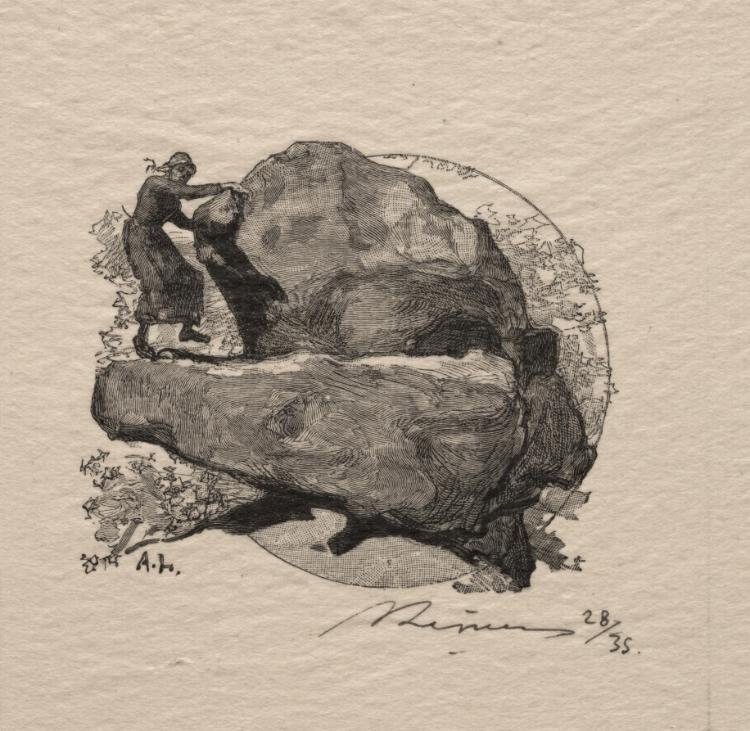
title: La roche qui tremble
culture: France, 19th-20th century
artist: Auguste Louis Lepère (French, 1849–1918)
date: 1890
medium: wood engraving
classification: Print